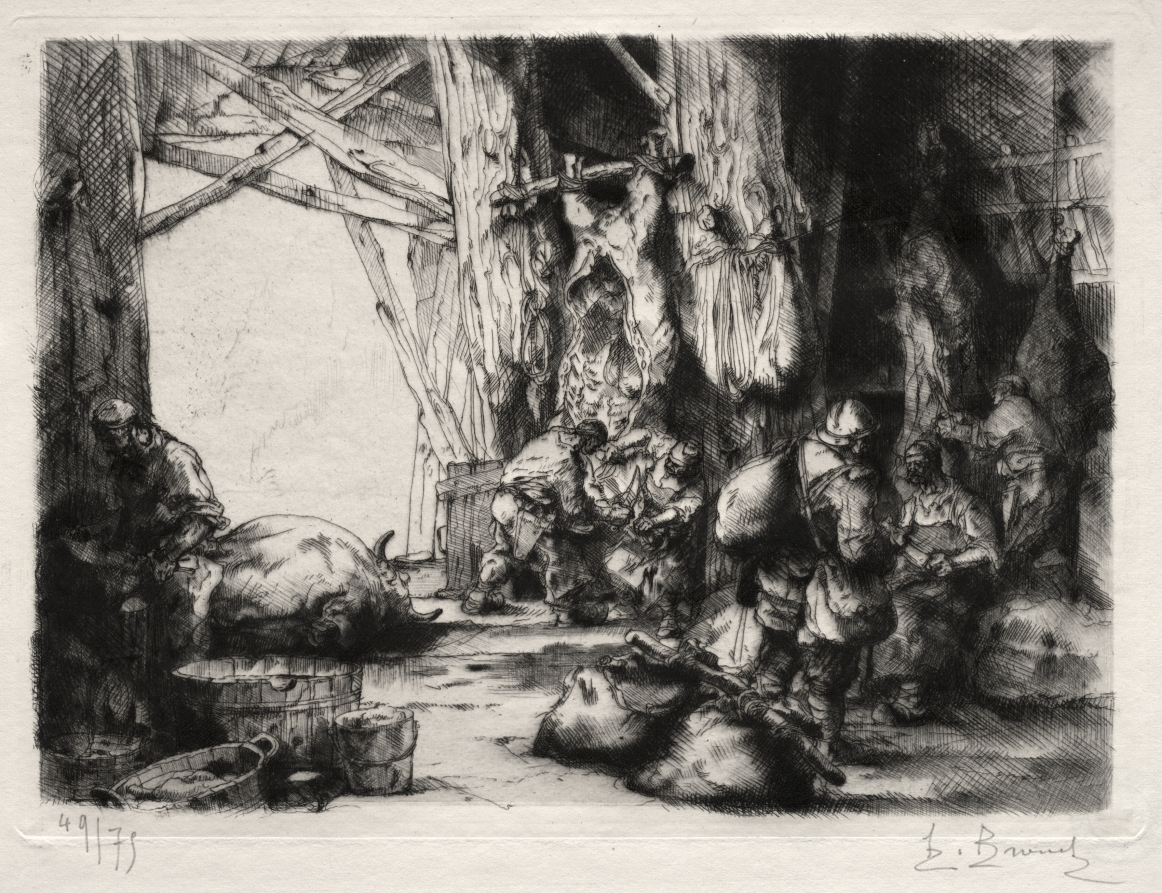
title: La Boucherie Militaire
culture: France, 20th century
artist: Auguste Brouet (French, 1872–1941)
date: before 1925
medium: etching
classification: Print